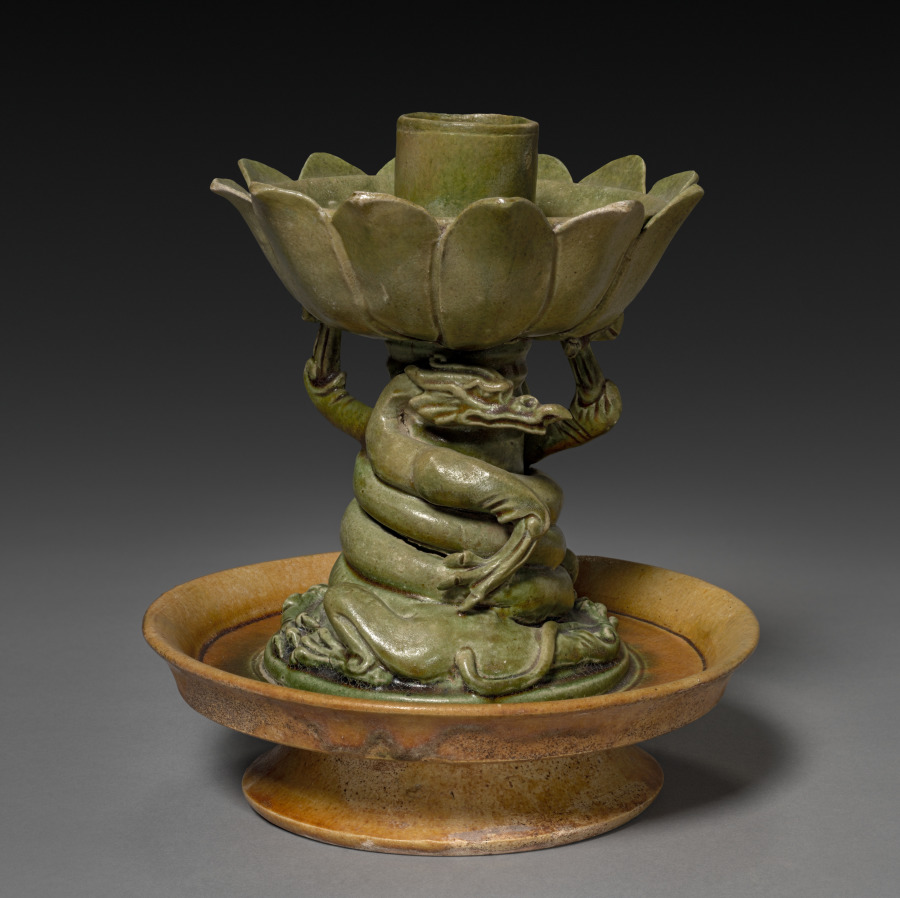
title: Lamp Stand with Coiling Dragons and Lotus Design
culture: China, Sui dynasty (581-618) to early Tang dynasty (618-907)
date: 581–907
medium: Glazed earthenware, sancai (three-color ware)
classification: Ceramic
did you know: This lampstand presents a coiling dragon and an elaborately shaped flower-petal dish.